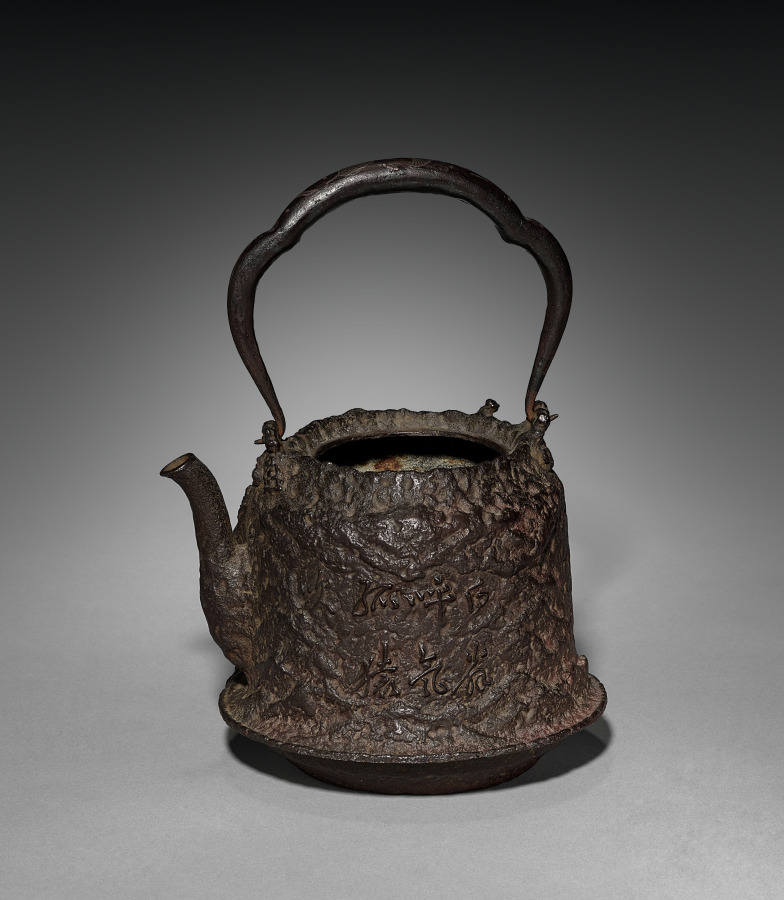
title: Covered Tea Kettle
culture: Japan, Edo period (1615–1868)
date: 1615–1868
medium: iron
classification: Metalwork